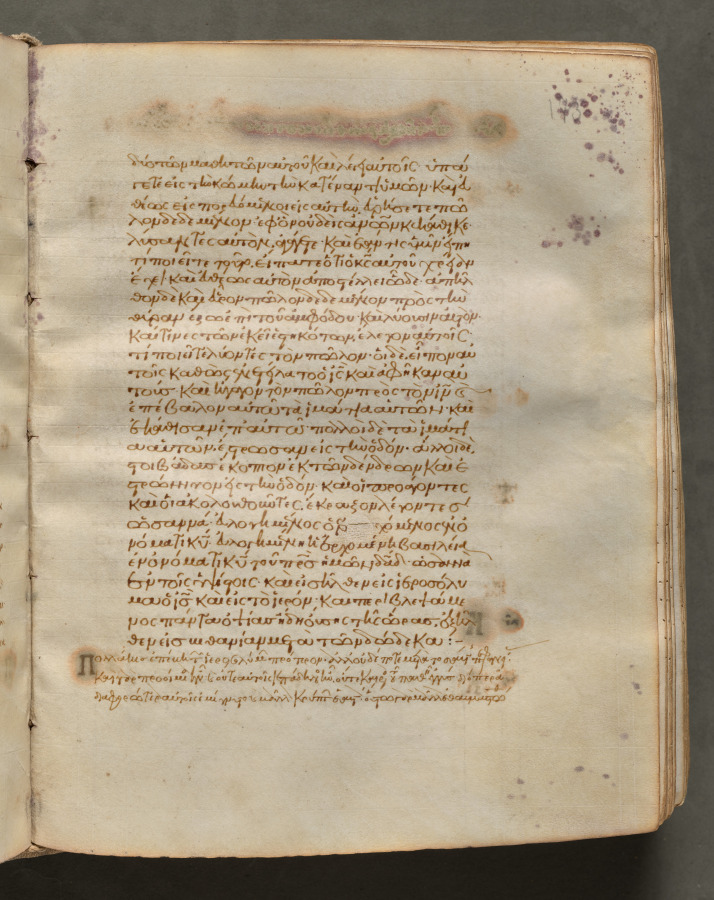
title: Text, folio 173 (recto), from a Gospel Book with Commentaries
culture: Byzantium, Constantinople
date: c. 1000–1100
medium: ink, tempera, and gold on vellum; leather binding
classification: Bound Volume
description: Each of the four gospels in this book opens on a page with brilliantly illuminated borders depicting the author of the text as well as birds-principally peacocks, symbols of the immortality of the soul-and fountains, representing the fountain of life and the salvation of the soul. This volume consists of 428 leaves with texts in Greek. Its level of sophistication suggests that it was probably written and decorated in a monastery in Constantinople.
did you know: Gospel Books were carried in procession through Byzantine churches.